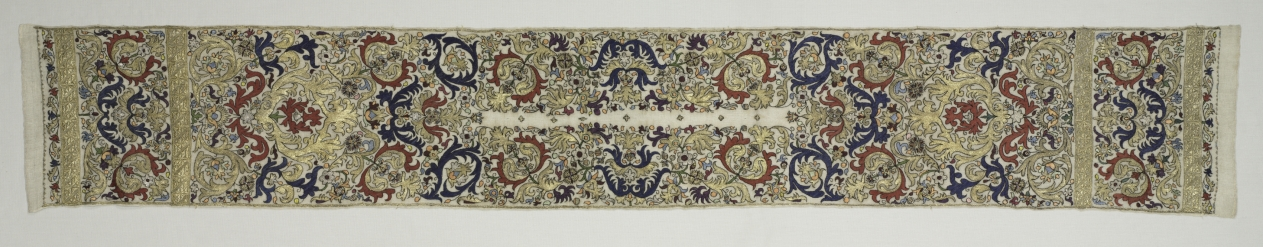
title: Kerchief (tensifa)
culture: Africa, North Africa, Algeria, Algerian embroiderer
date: 1700–1899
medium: Linen, silk, gold, silver, dye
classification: Embroidery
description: This beautiful kerchief, worn wrapped around the head, was part of elegant bathing equipment that well-to-do women wore while relaxing in a hammam after bathing. The floral and foliate embroidery reflect a fashion that lasted for more than a century. This example is dominated by lavish, radiating gold and silver thread.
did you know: Tiny traces of graphite on this textile show us how the artist carefully outlined the design to be embroidered.